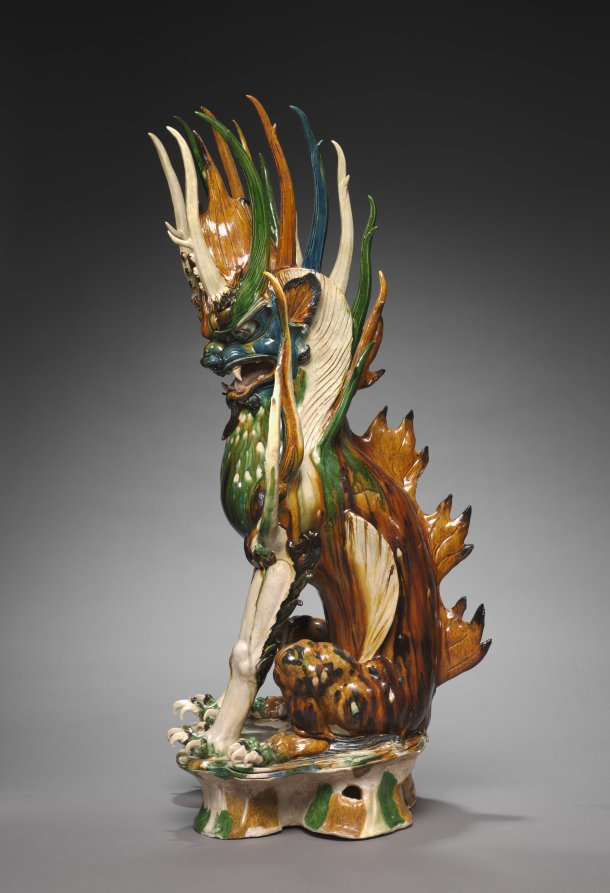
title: Tomb Guardian with Animal Head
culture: China, probably Shaanxi province, Xi'an, Tang dynasty (618-907)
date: early 700s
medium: glazed earthenware, sancai (three-color) ware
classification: Ceramic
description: With their fierce expressions and exaggerated physical features, fantastic guardian creatures were intended to guard the entrance to a tomb, warding off evil as well as keeping the soul of the deceased from wandering. Known as "earth spirits" or qitou, this one has an animal face and a pair of antlers growing above its eyebrows; the other sports a human face with huge protruding ears and a short horn surrounded by fiery, twisting hair. Their many elongated spikes heighten the fearful intensity. Before tomb sculptures were placed in the tomb, they were carried through the streets in a funerary procession. Funerary gifts provided the deceased with means for the afterlife. They were also an expression of filial piety and demonstrated the wealth and power of the descendants.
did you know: Sancai (three-color) glazes in green, amber, and transparent white, plus expensive cobalt blue glaze, show the high social status of the tomb’s occupant.